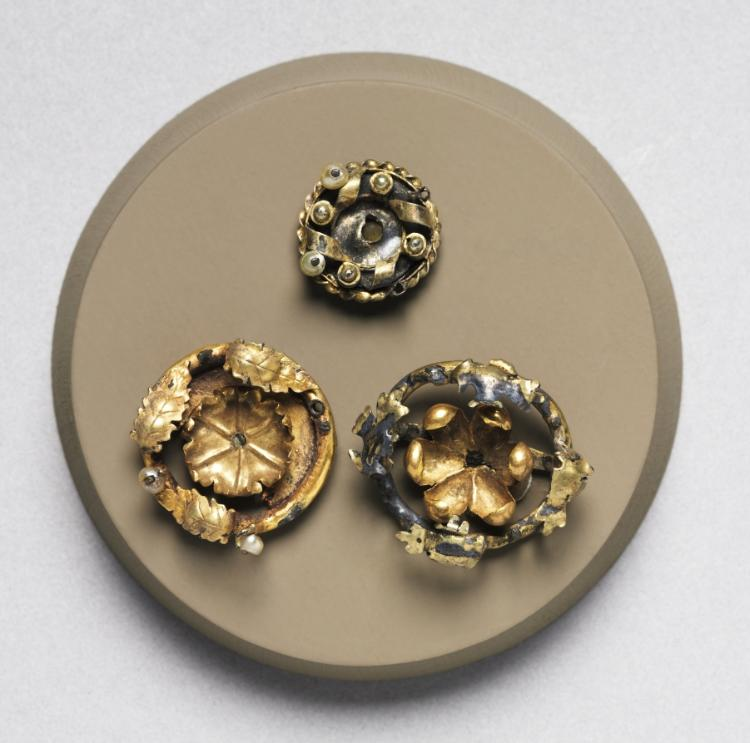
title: Brooch (Element of Garment Clasp)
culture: France, Paris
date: c. 1400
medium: gold, gilt silver and pearls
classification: Jewelry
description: During the 1300s, brooches like were ordinarily worn at the neck to clasp a lady's cloak or dress. They could also be sewn into a garment or hat as an ornament.